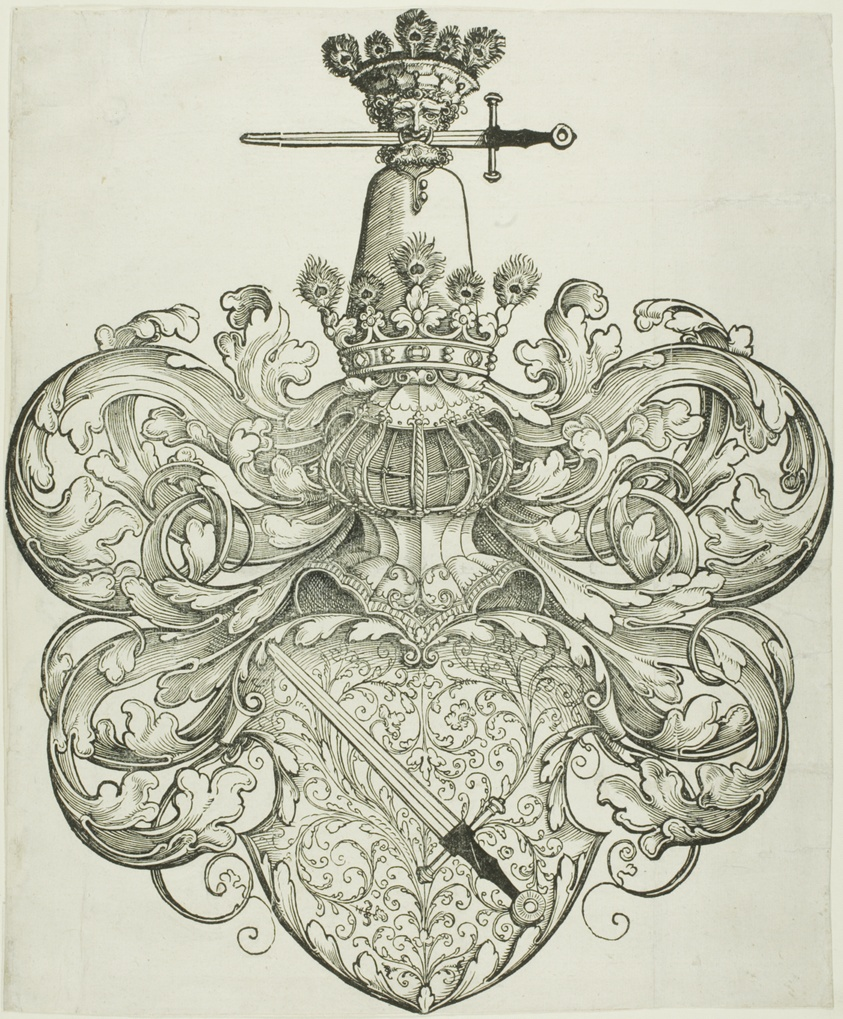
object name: Print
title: The Arms of the Family Kress von Kressenstein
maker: Nuremberg School (German, 16th century)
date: after 1530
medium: Woodcut on ivory laid paper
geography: Germany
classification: woodcut; print; prints and drawing